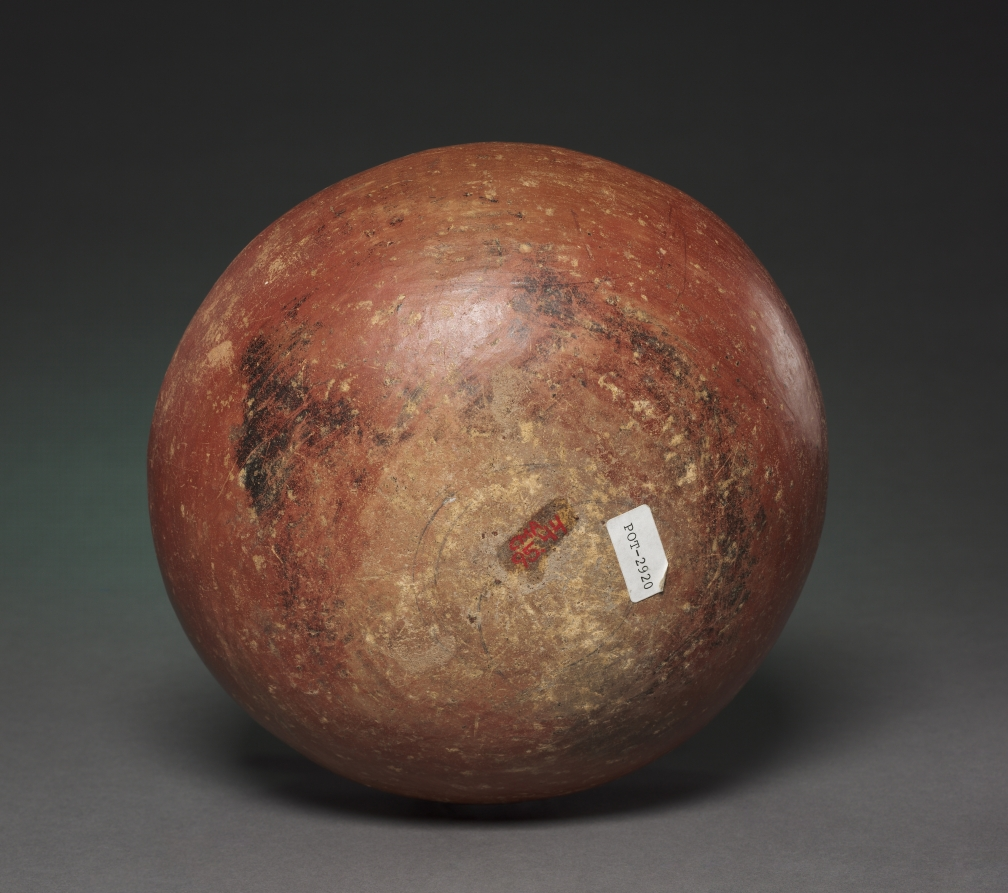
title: Double-Spouted Vessel with Reclining Figure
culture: Colombia, Calima region, Yotoco style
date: c. 1–800 CE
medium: ceramic, slip, resist paint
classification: Ceramic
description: This headdress ornament reveals a considerable flair for showmanship through its size and many suspended parts, which would have swayed and glittered with the wearer's motion. Like many other Yotoco ornaments, it features an enigmatic human face with closed eyes, a huge nose ornament that hides the lower face, and great disks that dangle from the ears.